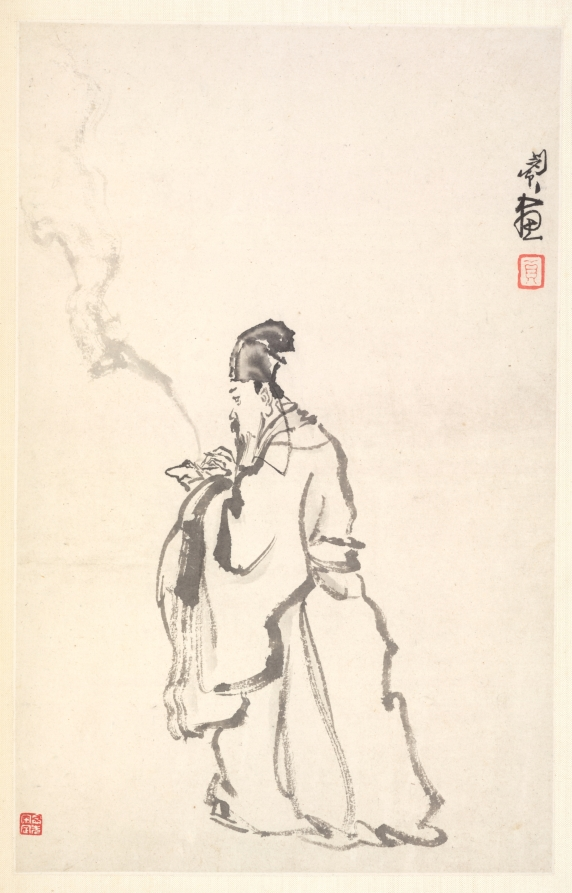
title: Su Dongpo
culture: China, Qing dynasty (1644-1911)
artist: Min Zhen (Chinese, 1730–after 1788)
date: 1788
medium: album leaf, ink on paper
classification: Painting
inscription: Inscription by Min Chen on the last leaf: I have a habit of collecting strange rocks. My friend Tai-li shan-jen* treasures my paintings as much as I treasure strange rocks. Once we agreed to exchange what we love with each other. However, my busy activities have kept me from carrying this out. This summer I realized that this strange rock has been sitting in my studio for five years, so I painted this to fulfill my old promise. As a record, I chose the grotesque cliff in the last scene of this twelve-leaf album. Cheng-chai, Min Chen inscribed this on the sixth day of the sixth month [July 9] of the wu-shen year [1788]. * Tai-li shan-jen is Wang Li [tzu: Li-fu] tr. Hou-mei Ishida Six seals appearing on the leaves: Min Chen, Cheng-chai, Ching-ch'iao, Chen, Liao-t'ang, Min Chen chih-yin.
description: Min Zhen, who was orphaned at age 12 and developed an eccentric personality, was trained by Tang Yin (1682–1756), a writer, playwright, and superintendent of the imperial porcelain workshops in Jingdezhen. The connection to him may have enabled Min to stay in Beijing for a decade from around 1773. It is not clear whether he ever resided in Yangzhou, but his style is in many instances reminiscent of that of Yangzhou artist Huang Shen. This album demonstrates Min’s versatility and mature style in the last years of his life.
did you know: Su Dongpo 蘇東坡 (1037–1101) is the likely model, but the gentleman is holding an incense burner instead of an ink stone more commonly associated with the famed poet.